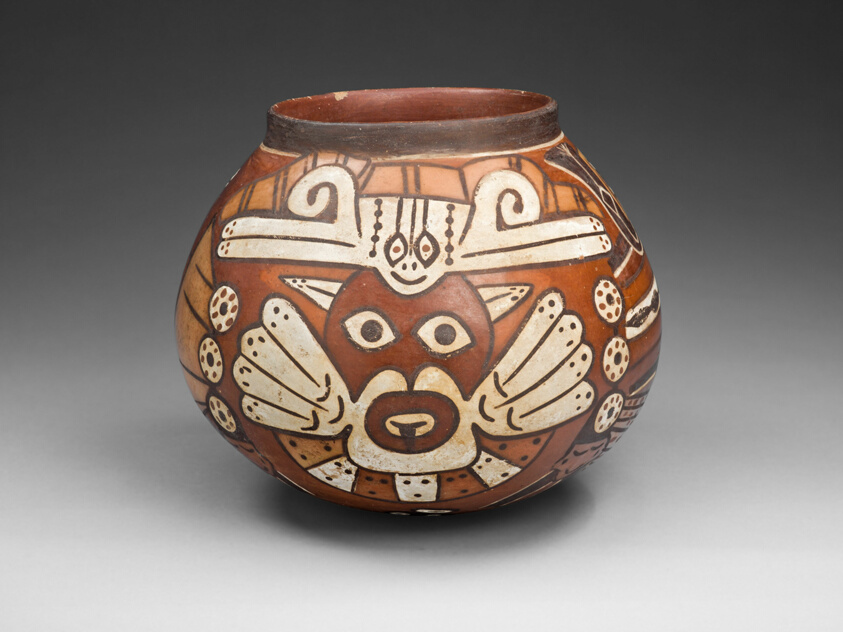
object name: Vessel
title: Vessel Depicting a Costumed Ritual Performer Holding a Staff and a Trophy Head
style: nazca, early intermediate period, Pre-Columbian, americas, Arts of the Americas, andean, andes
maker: Nazca; South coast, Peru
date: 180 BCE–500 CE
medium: Ceramic and pigment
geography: Peruvian South Coast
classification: earthenware; art of the americas; ceramics; vessel